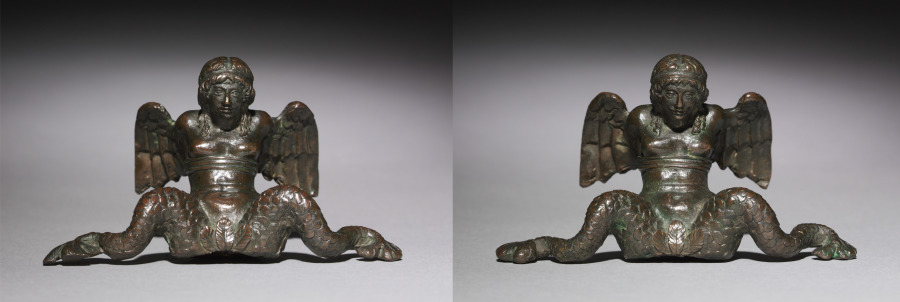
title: Doorpull (pair)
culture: Italy, 16th century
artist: Leone Leoni (Italian, 1509–1590)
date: 16th century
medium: bronze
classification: Sculpture